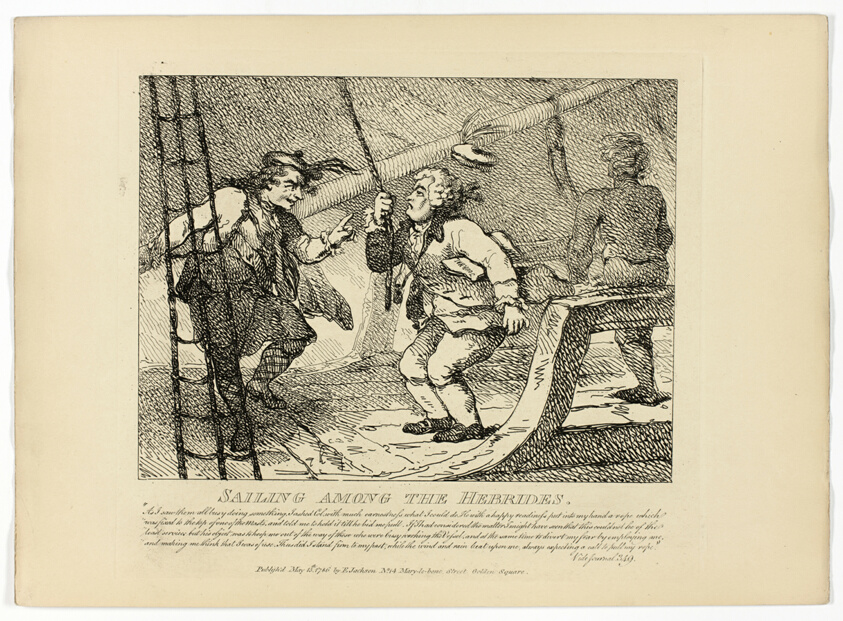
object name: Print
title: Sailing Among the Hebrides, from Boswell's Tour of the Hebrides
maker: Thomas Rowlandson (English, 1756-1827)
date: 1786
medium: Etching on paper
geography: England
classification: etching; print; prints and drawing